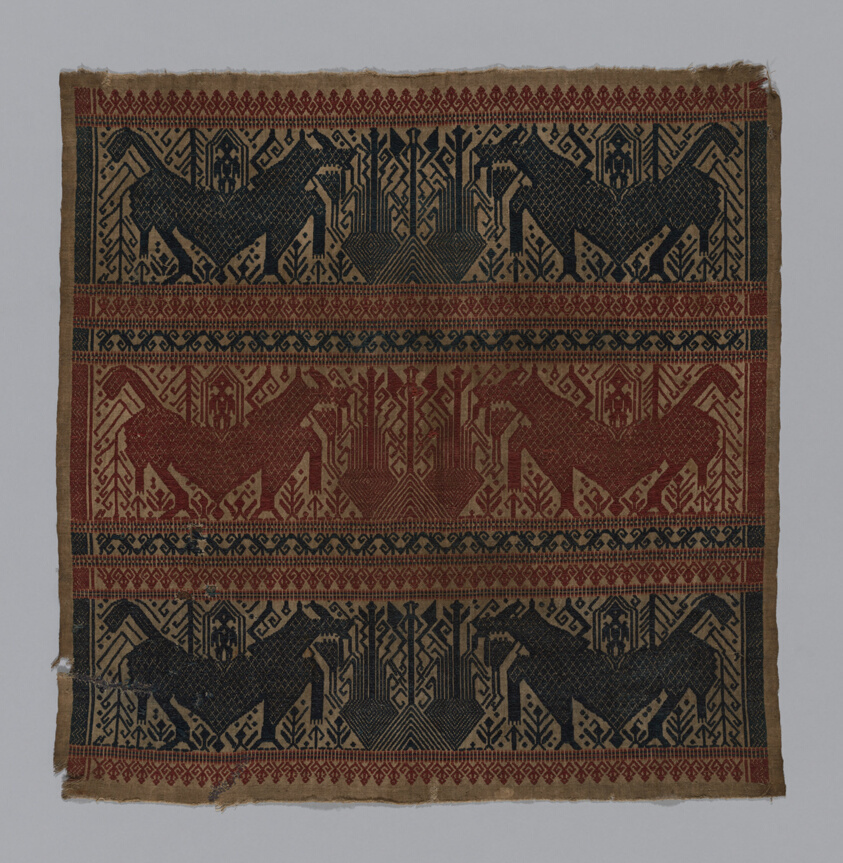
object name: Textile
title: Tampan (Ceremonial Cloth)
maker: Paminggir (Indonesia, South Sumatra, Lampung)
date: 19th century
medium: Cotton, plain weave with supplementary patterning wefts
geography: Indonesia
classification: textile; weaving; costume